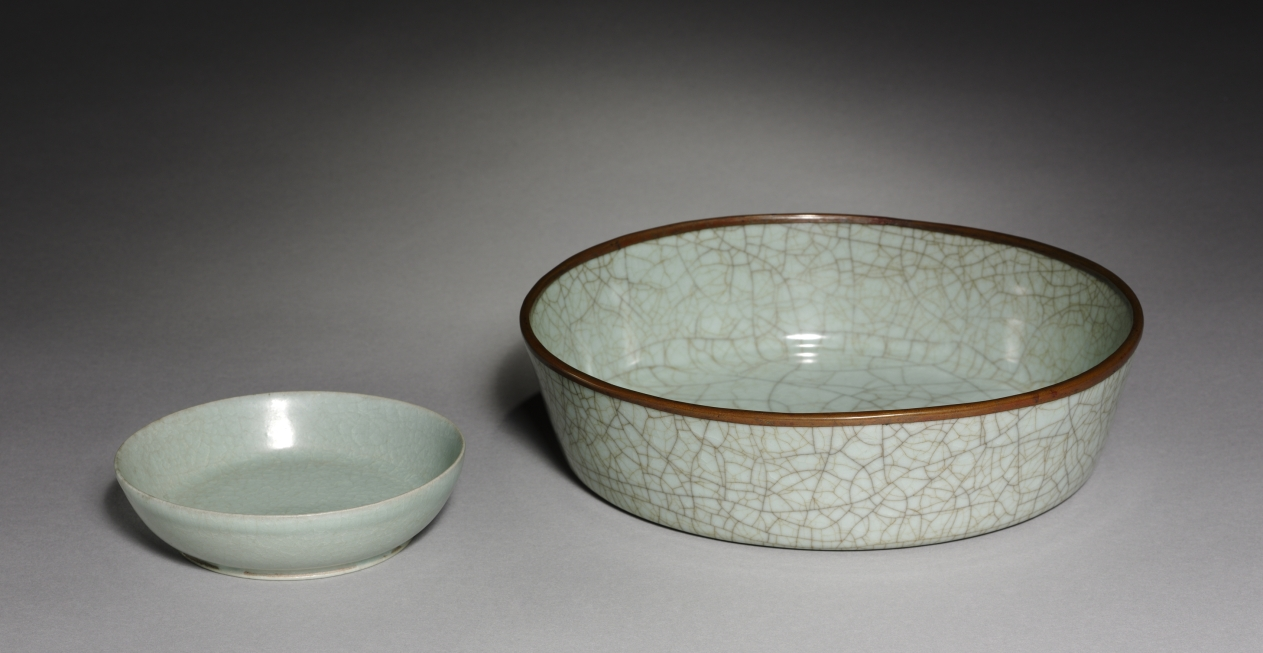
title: Brush Washer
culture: China, Henan Province, Baofeng, Qingliangsi, Northern Song dynasty (960-1127)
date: late 1000s–1127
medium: porcelaneous stoneware, Ru ware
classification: Ceramic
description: Ru ware is the rarest and most celebrated of all Chinese imperial wares. It was made for the late Northern Song court for a very short time and was therefore extremely rare and precious. Simplicity and refined elegance are Ru ware's hallmarks. Its graceful shape, soft luster, and subtle color variation of the glaze interact in perfect unity. Other physical characteristics include an ash-grey body, soft greyblue glaze with a fine crackle, as well as small sesame-seed spur marks on the base.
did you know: The little black spot in the glaze inside the dish is one of the slight imperfections characteristic of genuine Ru ware.